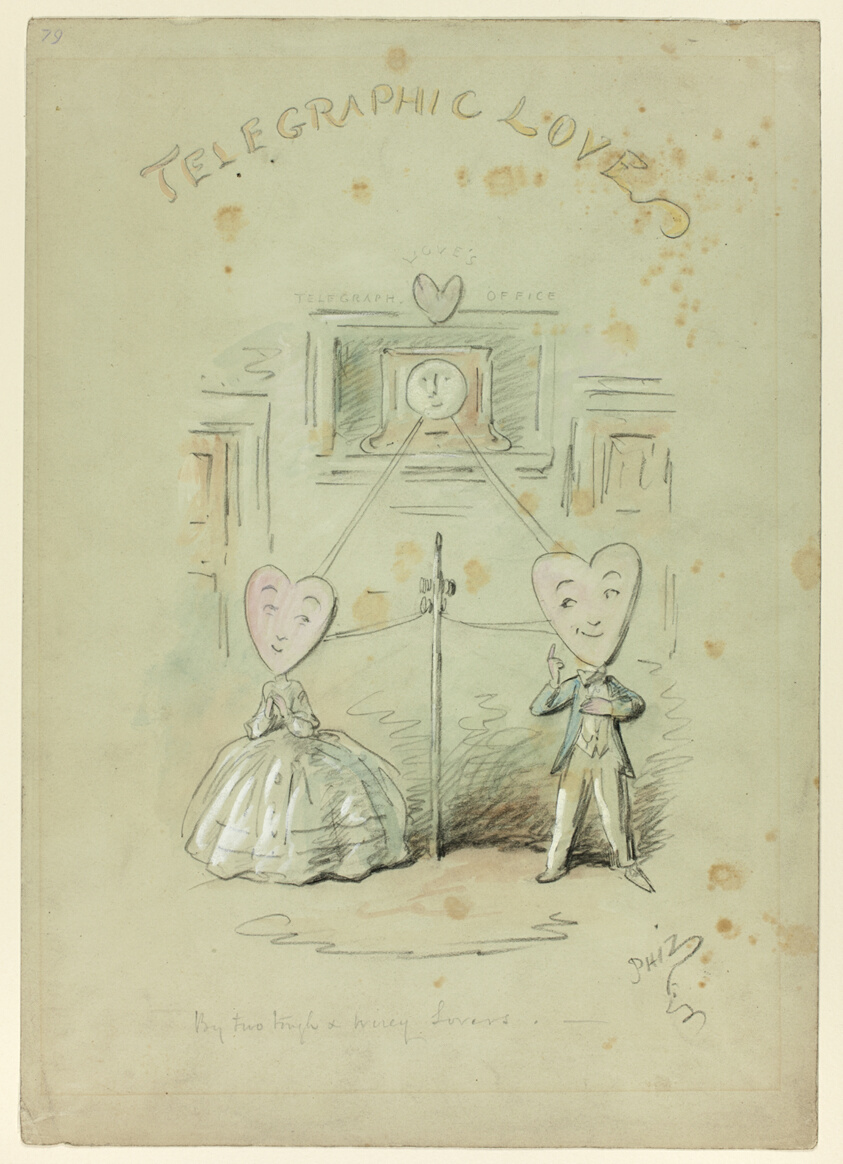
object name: Drawing and Watercolor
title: Telegraphic Love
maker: Hablot Knight Browne (English, 1815-1882)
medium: Charcoal, with watercolor, heightened with white gouache, on grayish-green wove paper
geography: England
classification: watercolor; drawings (visual works); prints and drawing